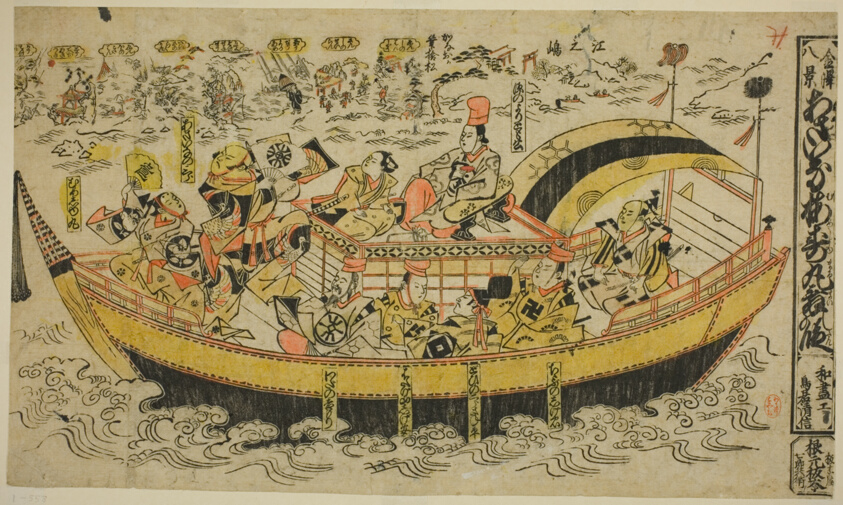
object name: Print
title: Eight Scenes of Kanazawa (Kanazawa hakkei): The Dance of Asahina and Umejumaru (Asaina Umejumaru mai no dan)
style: Japanese (culture or style)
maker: Torii Kiyonobu I (Japanese, 1664-1729)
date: c. 1707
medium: Hand-colored woodblock print; o-oban yoko-e, tan-e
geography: Japan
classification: woodblock print; print; asian art